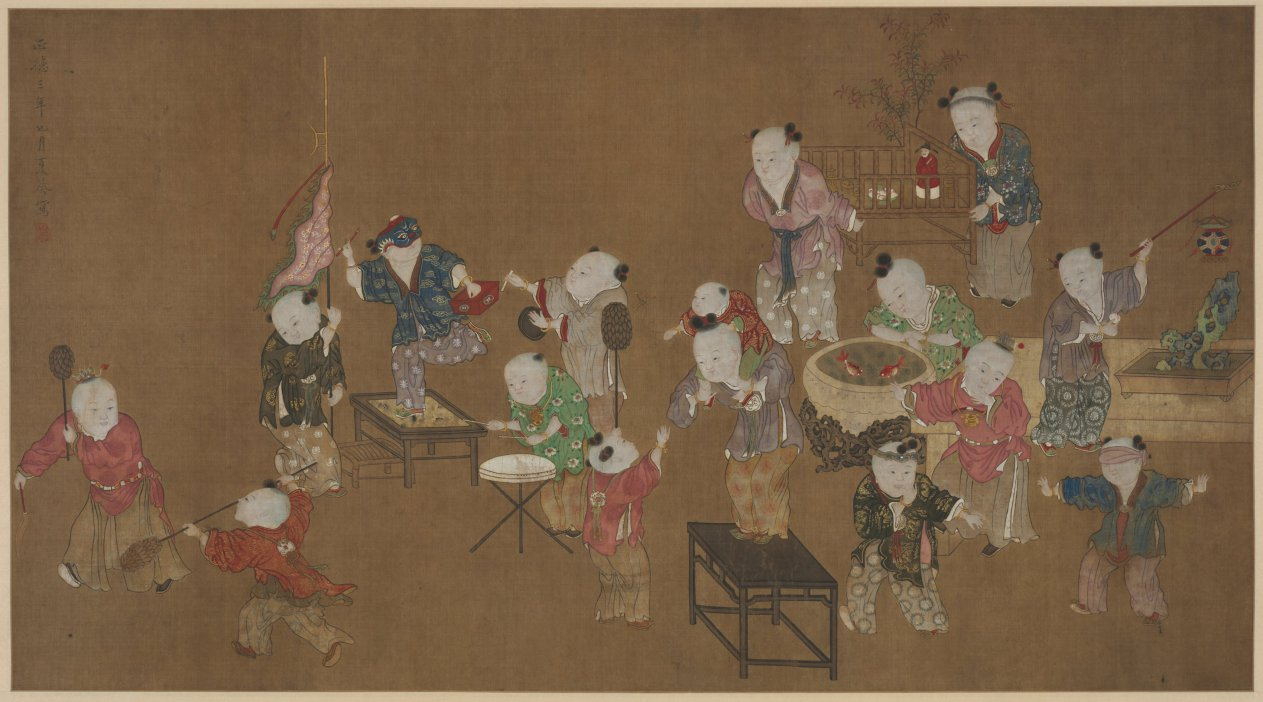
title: Children at Play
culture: China, Ming dynasty (1368–1644)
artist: Xia Kui (Chinese, active c. 1405–1445)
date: 1508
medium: hanging scroll; ink and color on silk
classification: Painting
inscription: 正德三年七月夏葵寫 [Zhengde san nian qi yue Xia Kui xie]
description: Sixteen children engage in scholarly, religious, and military activities, representing the popular “one hundred boys” theme expressing the wish for abundant, successful male offspring. Such paintings conveying auspicious wishes were often displayed during the New Year festival season. Two older boys wear small crowns with red tassels. Another child with a mask holds a brush in one hand, a rice measure in the other. He stands on a low table imitating Kuixing, the God of Examinations and servant to the God of Literature.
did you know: In the foreground on the right are three boys playing a kind of blind man’s bluff.